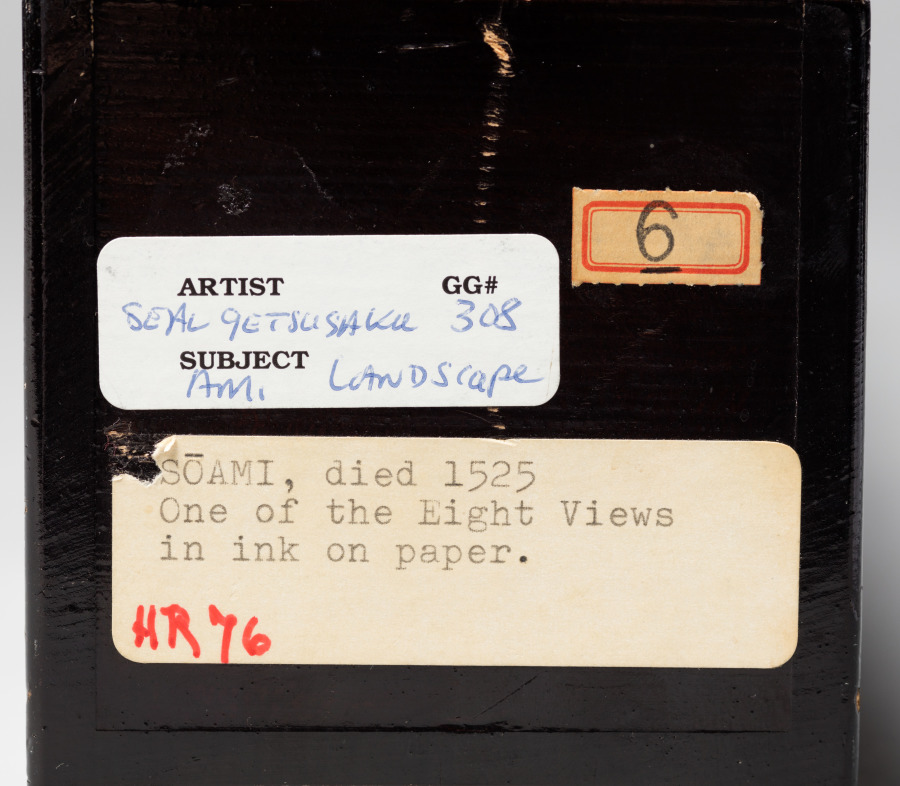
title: Landscape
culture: Japan, Edo period (1615–1868)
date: early 1600s to mid-1800s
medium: hanging scroll; ink on paper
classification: Painting